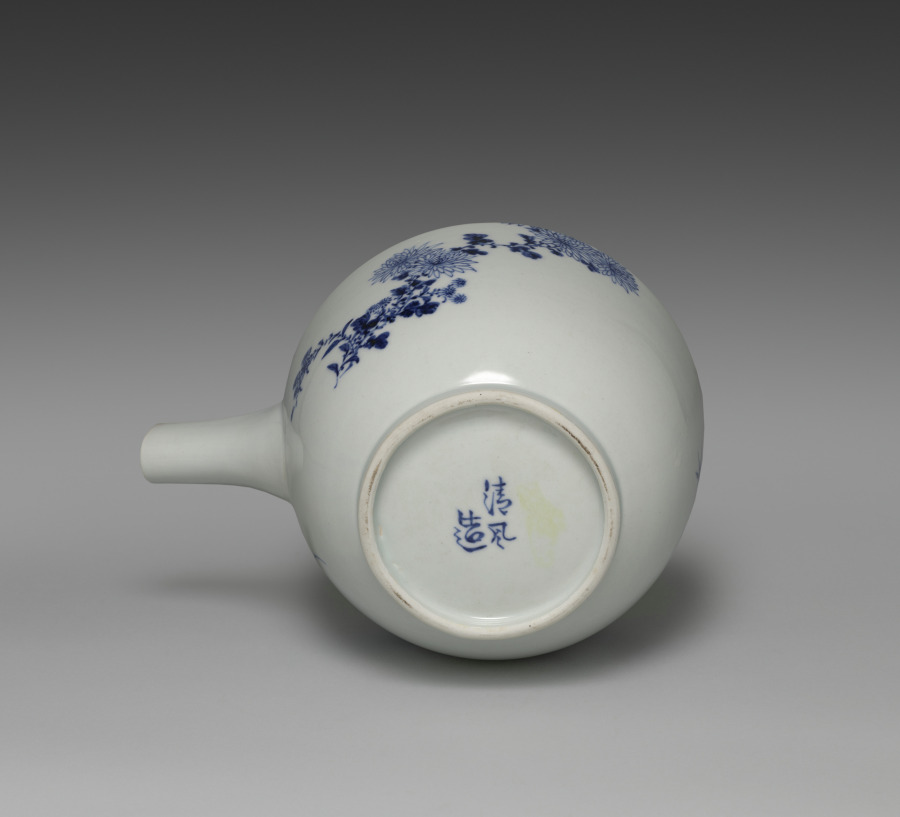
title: Sake Pourer with Chrysanthemum, Orchid, and Plum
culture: Japan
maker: Seifū Yohei III (Japanese, 1851–1914)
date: c. 1887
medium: Porcelain with underglaze blue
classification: Ceramic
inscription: Artist's signature in underglaze blue on the base.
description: This sake pourers has a wide basin with a low foot; a generous spout open across the top half; a flat, round lid with a small knob recessed flush to the top of the container; and a tall, arched handle that meets the container where the top joins the basin at a sharp angle. It has a painting in underglaze blue of the Four Nobles: chrysanthemum, orchid, plum, and bamboo. Unlike the creamy white color of some Yohei III works, the white of this sake pourer has the bluish cast typical of porcelains produced in Kyoto. It is signed in underglaze blue on the base.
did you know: This sake pourer is decorated with the Chinese theme of the Four Nobles, in which the qualities of a good person are represented by plant.